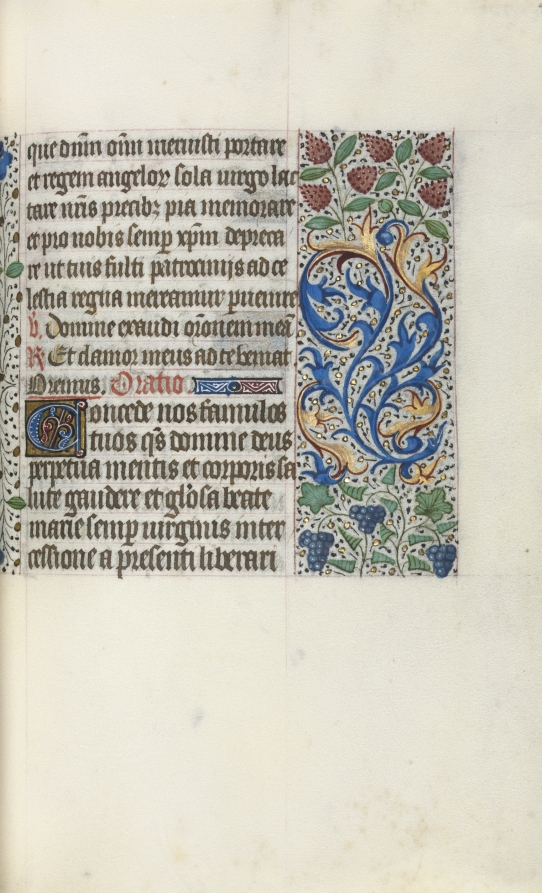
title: Book of Hours (Use of Rouen): fol. 49r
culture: France, Rouen, 15th century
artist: Master of the Geneva Latini (French, active Rouen, 1460–80)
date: c. 1470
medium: ink, tempera, and gold on vellum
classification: Bound Volume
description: In the late 1400s and early 1500s Rouen was an established and important center of book production. The city’s cathedral had a wealthy chapter that spent large sums of money to commission books and to maintain its extensive library. The stationers and booksellers would have likely been concentrated in or near the cathedral precinct. This artist, named after a manuscript now in Geneva, was Rouen’s principal illuminator during the second half of the 1400s.